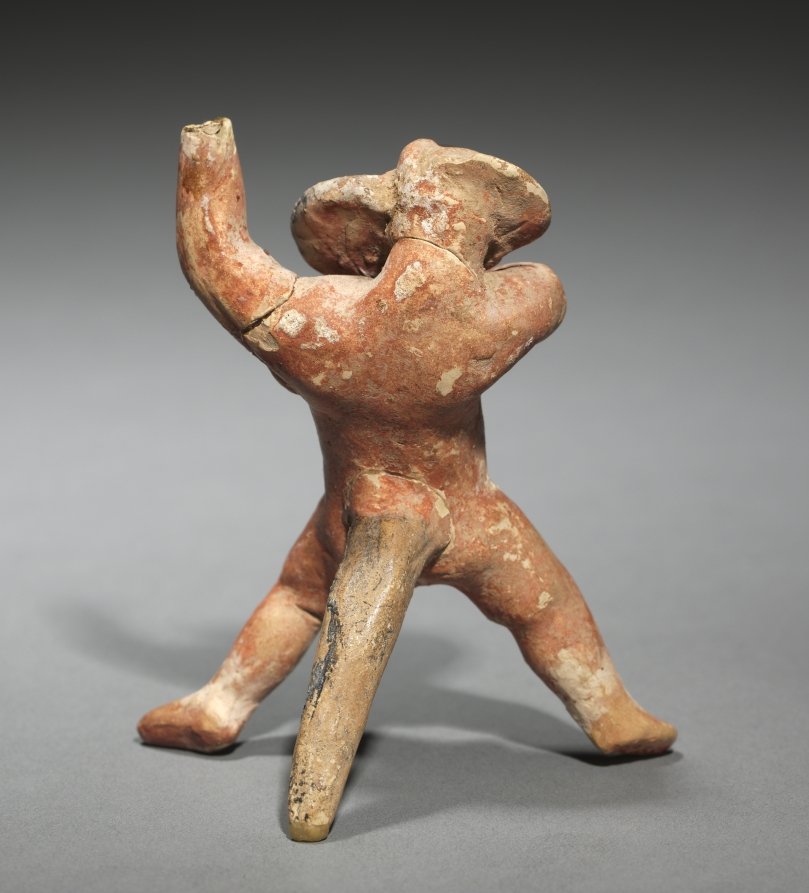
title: Dancing Satyr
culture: Greece, Boeotia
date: 500–475 BCE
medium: painted terracotta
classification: Sculpture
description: Part man and part beast, satyrs were mythical woodland creatures. In art, they were depicted with the ears and tail of a goat or horse, sometimes with hooves, and in a high state of sexual arousal. Satyrs often accompanied Dionysus, the god of wine, in his drinking bouts and other escapades. These three probably once decorated the rim of a large punch-bowl–shaped vessel for serving wine.